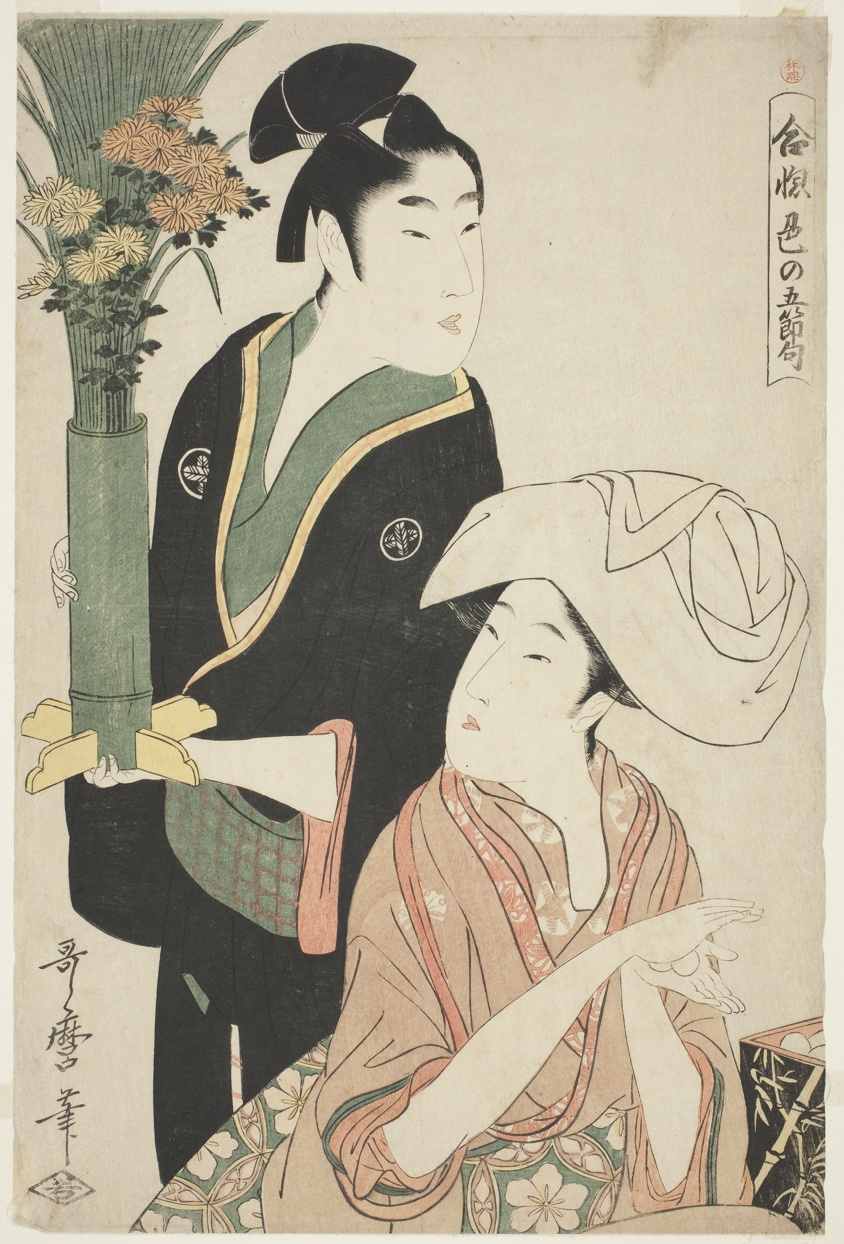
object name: Print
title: The Ninth Month, from the series Five Amorous Festivals of Love (Aibore iro no gosekku)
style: Japanese (culture or style)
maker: Kitagawa Utamaro 喜多川 歌麿 (Japanese, 1753 (?)-1806)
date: 1801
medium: Color woodblock print; oban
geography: Japan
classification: woodblock print; print; asian art